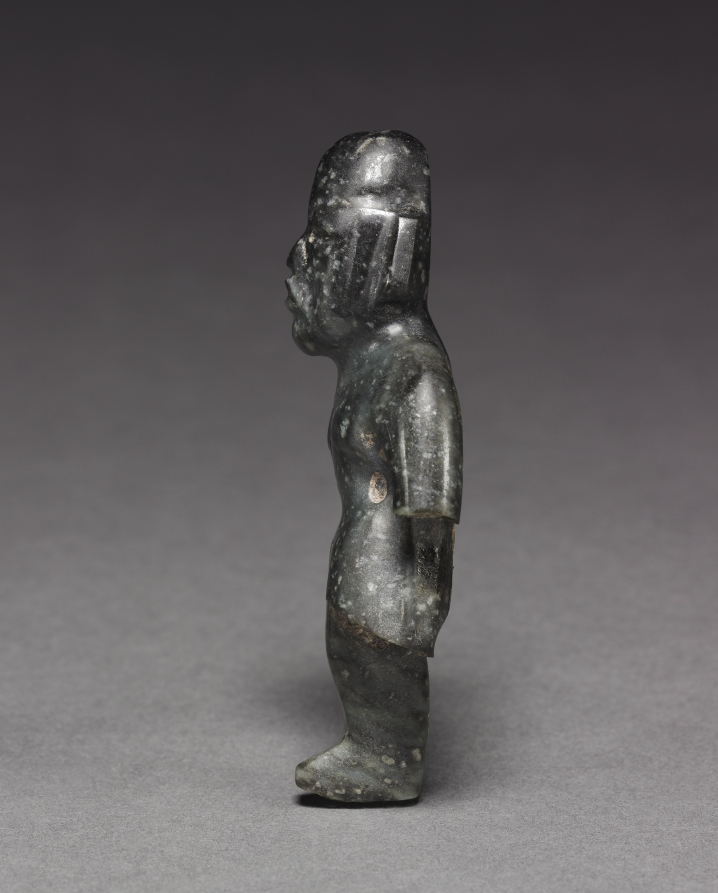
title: Figurine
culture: Mesoamerica, Mexico, Olmec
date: 1200–300 BCE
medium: jadeite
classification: Jade